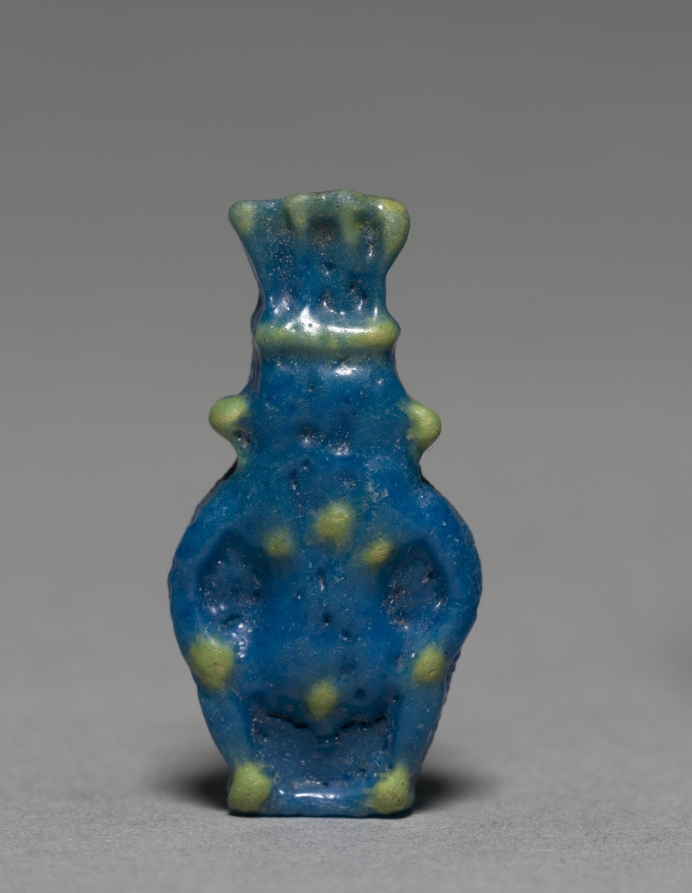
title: Amulet of Bes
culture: Egypt, Greco-Roman period (332 BCE–395 CE), Roman empire (30 BCE–395 CE)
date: 30 BCE–395 CE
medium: polychrome faience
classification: Amulets